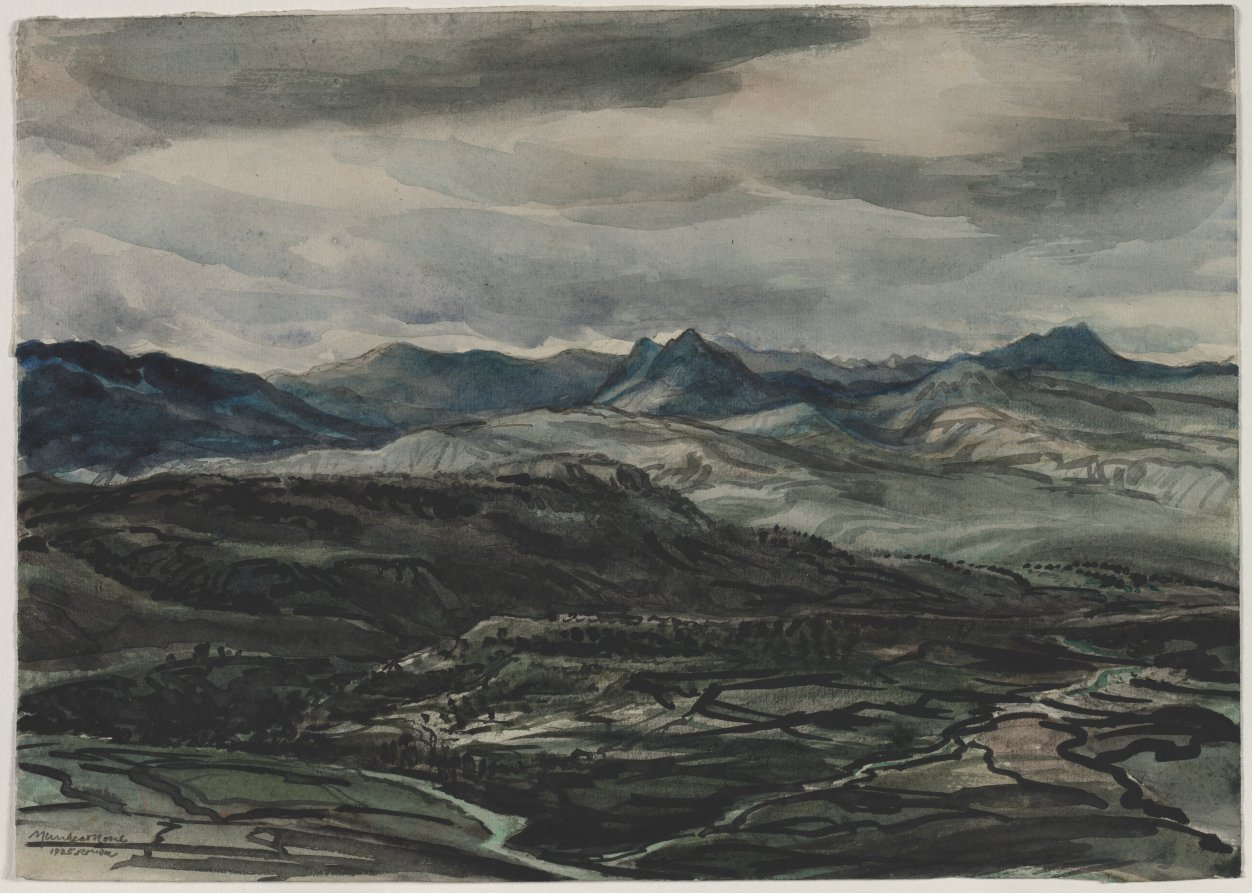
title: Storm Weather, Ronda, Spain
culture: England, 20th century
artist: Muirhead Bone (British, 1876–1953)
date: 1925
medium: watercolor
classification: Drawing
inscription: In graphite, lower left: "Muirhead Bone (signed) 1925. Ronda"